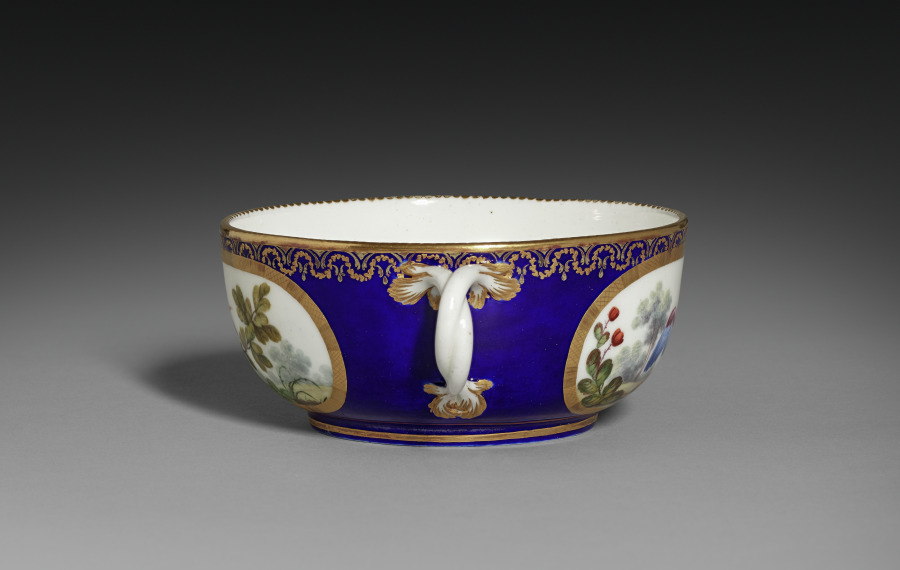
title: Broth Bowl (Écuelle Ronde)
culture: France, Sèvres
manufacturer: Sèvres Porcelain Factory (French, est. 1756)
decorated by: François-Joseph Aloncle (French)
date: 1772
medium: soft-paste porcelain with enamel and gilt decoration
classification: Ceramic